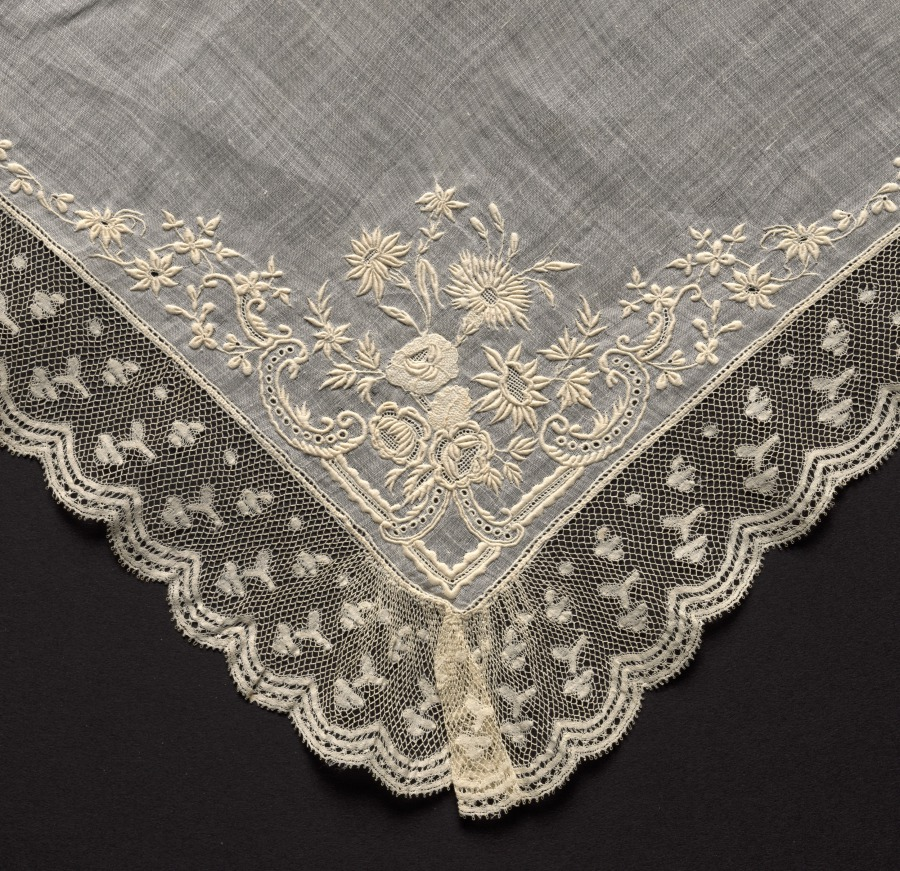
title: Lace Handkerchief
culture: Flanders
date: 1700s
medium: plain weave linen center with bobbin lace (Valenciennes lace) edging and embroidery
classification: Embroidery